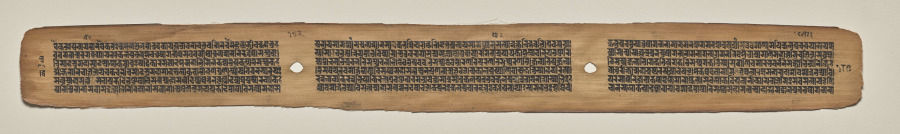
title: Text, folio 182 (verso), from a Manuscript of the Perfection of Wisdom in Eight Thousand Lines (Ashtasahasrika Prajnaparamita-sutra)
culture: Eastern India, Bihar, Vikramashila Monastery. Painting: Nepal, Kathmandu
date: Sunday, September 14, 1119 (year 239 of the Newar Samvat in the month of Ashvina)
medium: gum tempera and ink on palm leaves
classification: Painting